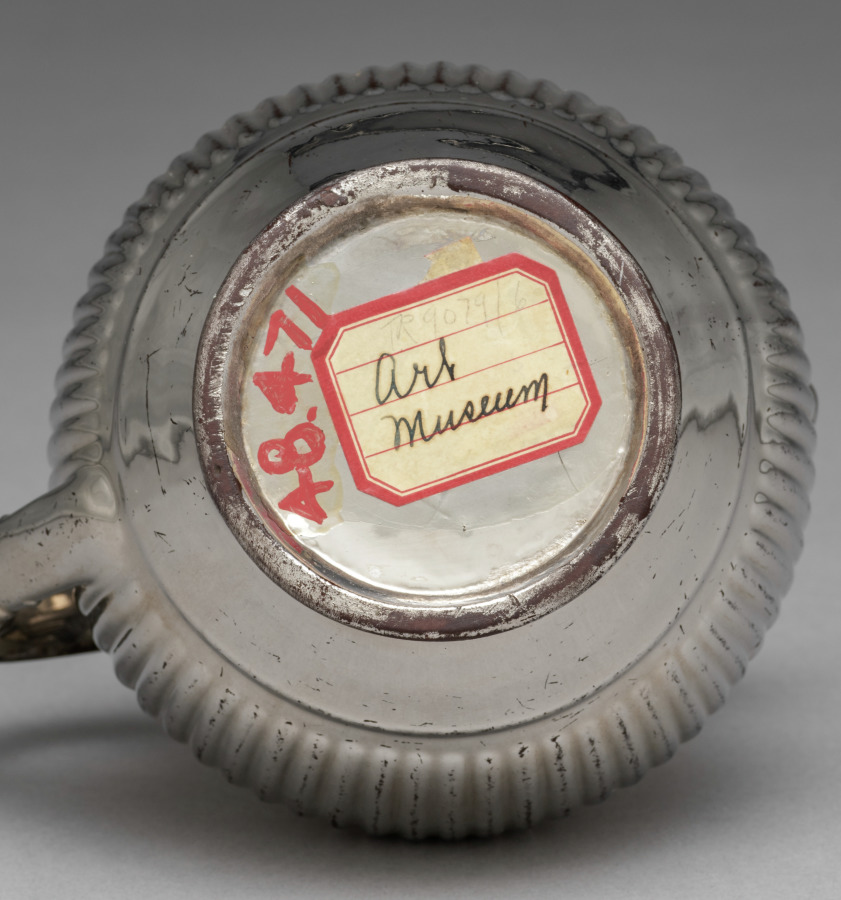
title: Jug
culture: England, Staffordshire, 19th century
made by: Staffordshire Factory (British)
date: 1800s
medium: lustreware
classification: Ceramic